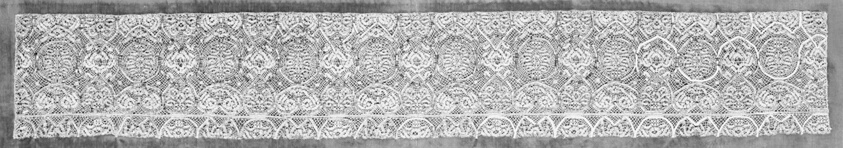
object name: Textile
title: Border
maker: Spain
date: c. 1660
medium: Gilt-and silvered-metal-strip-wrapped silk, silk-wrapped-animal-substrate strips, and gilt-metal-wire-wrapped animal substrate, bobbin straight lace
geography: Spain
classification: textile; lace - bobbin